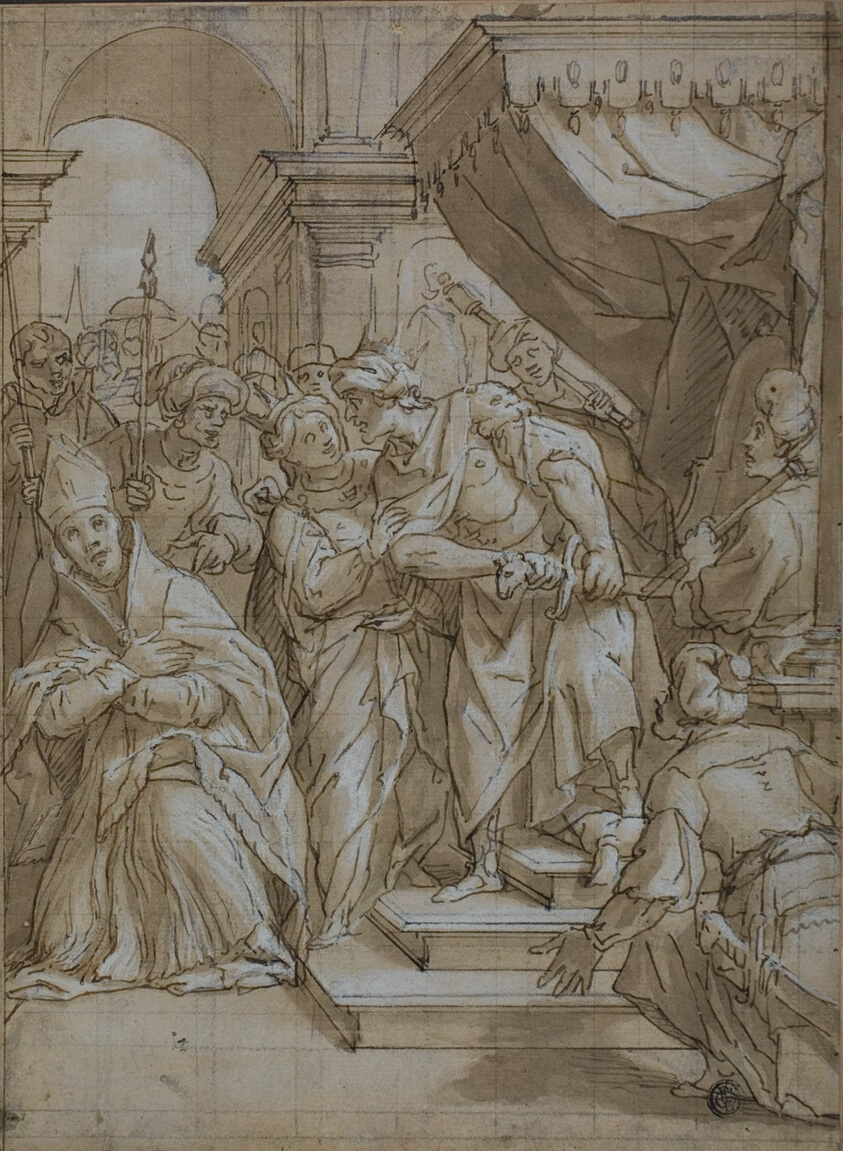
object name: Drawing and Watercolor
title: Queen Intervening to Spare the Life of a Bishop Saint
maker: Lazzaro Tavarone (Italian, 1556-1661)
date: c. 1634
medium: Pen and brown ink with brush and brown wash, heightened with lead white (partly discolored), on tan laid paper, squared in black chalk, laid down on ivory laid paper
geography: Italy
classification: ink with wash; drawings (visual works); prints and drawing